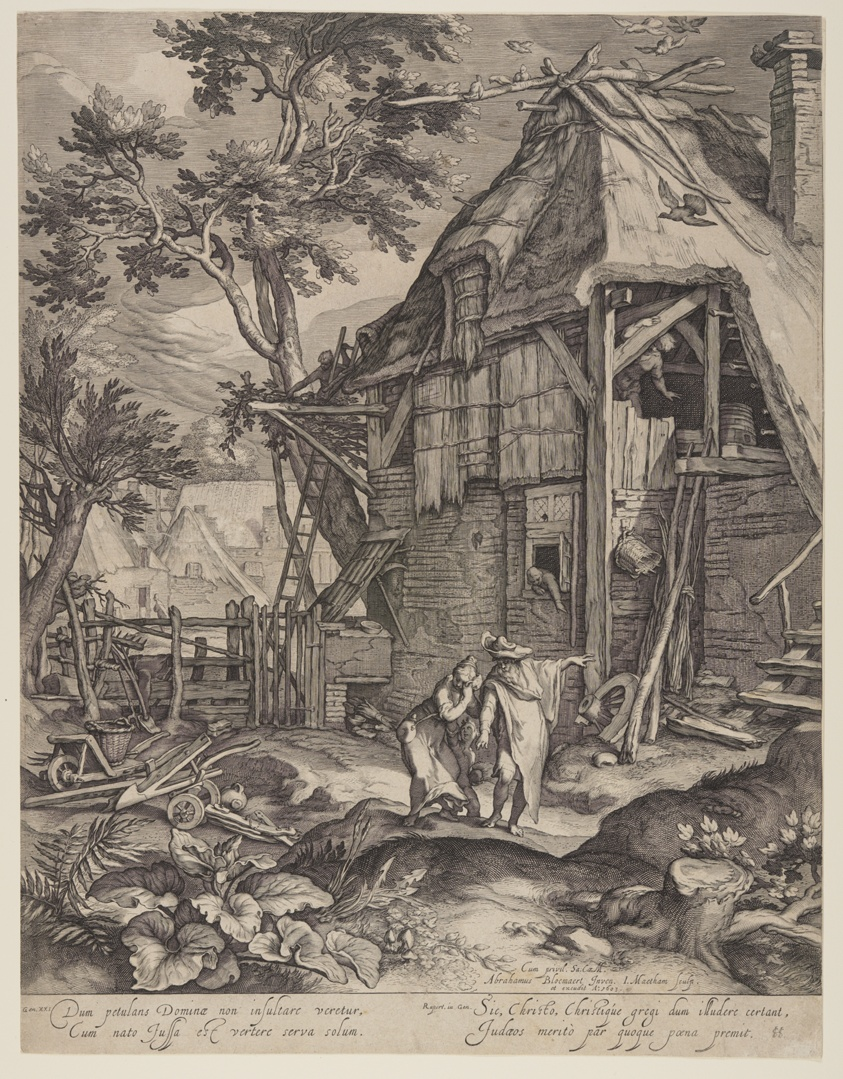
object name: Print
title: Abraham Casting out Hagar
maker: Jacob Matham (Dutch, 1571–1631); after Abraham Bloemaert (Dutch, 1566–1651)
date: 1603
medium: Engraving on ivory laid paper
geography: Netherlands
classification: engraving; paper; print; prints and drawing